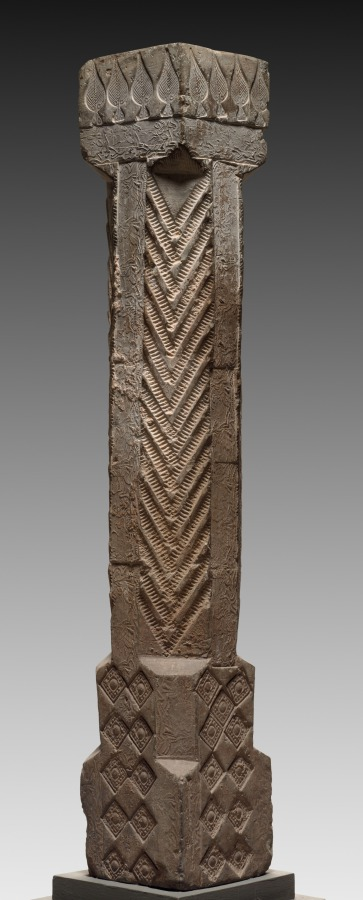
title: Hollow Tile: Column from Tomb-Chamber Doorway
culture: China, Han dynasty (202 BCE–220 CE)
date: 100–200 CE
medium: earthenware, die-stamped relief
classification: Ceramic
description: Striding tigers (top), racing horsemen (right column), and reverent officials (left column) are stamped into the surface of this underground portal to a tomb. The doorway preserves in stone the post-and-lintel structure, a basic element of Chinese wooden architecture. By the first century CE, a revolution in Chinese tomb construction and furnishing had taken place. Tombs lined with decorated bricks and tiles replace the earlier tombs constructed with only rammed-earth walls. Ceramic surrogates or models of stoves, houses, servants, and pets filled these more durable chambers, symbolically extending the creature comforts of this world into the world after death.